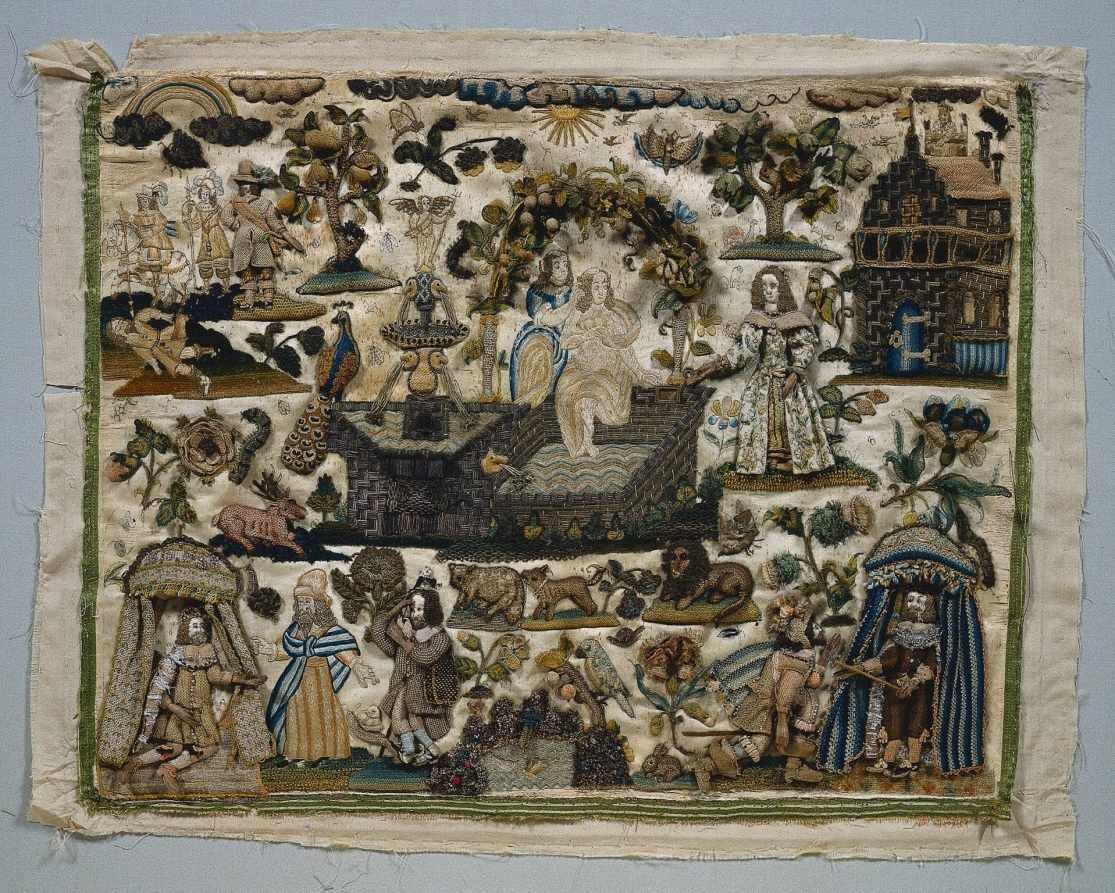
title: Stumpwork Panel: Story of David and Bathsheba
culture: England, 17th century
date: 1658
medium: stumpwork embroidery with silk and metallic threads, pearls and wooden appendages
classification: Embroidery